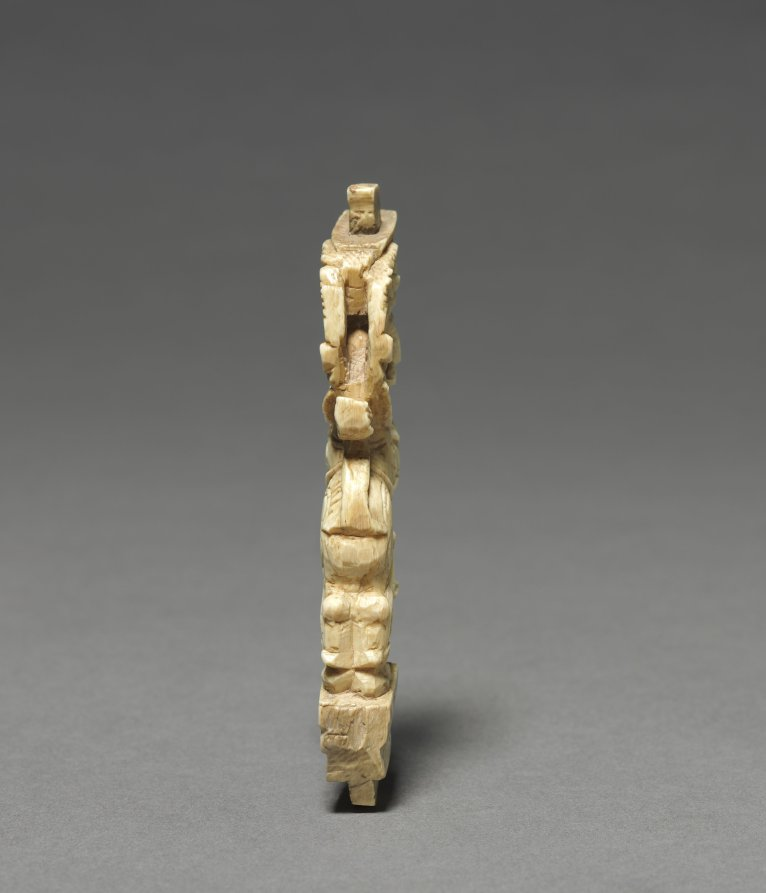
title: Carved Bracket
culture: South India, probably Madurai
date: 1600s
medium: Ivory with traces of pigment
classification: Ivory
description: Composite creatures with the body of a lion, tusks and trunk of an elephant, and horns of an antelope are standard elements of medieval Indian architecture and furniture. Traces of pigment indicate that these ivory furniture facings were brightly painted.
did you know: These composite beasts are called yali or vyala.